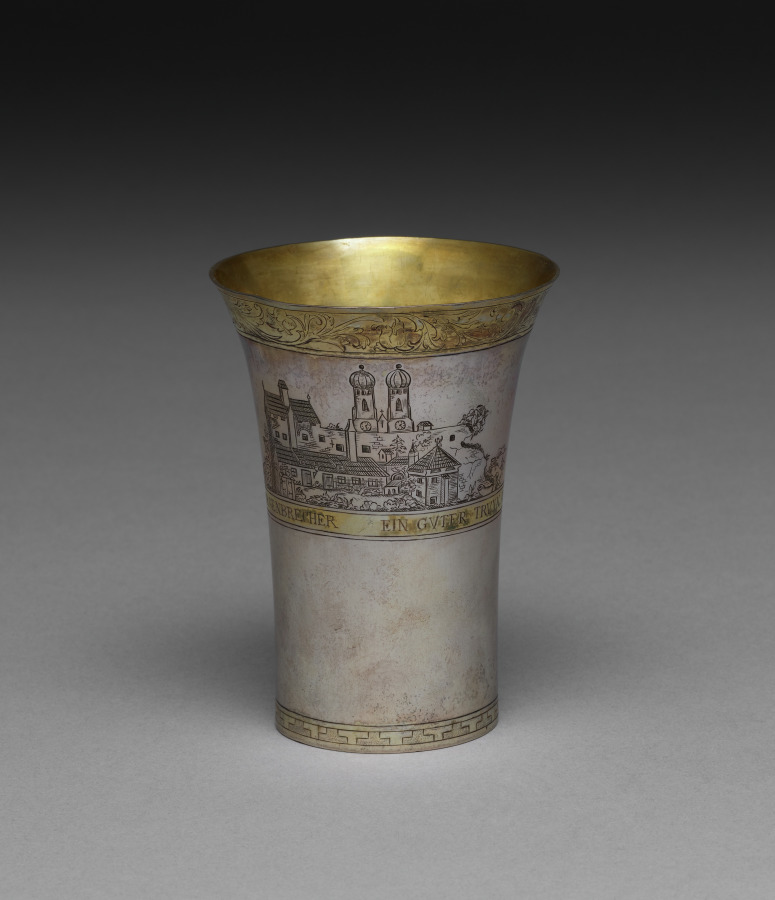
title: Beaker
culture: Germany, Munich, mid-18th century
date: mid 1700s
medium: silver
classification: Silver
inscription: Engraved around side: "EIN GVTER TRVNK AUS VOLLEM BECHER -- DAS IST DER BESTE SORGENBRECHER."